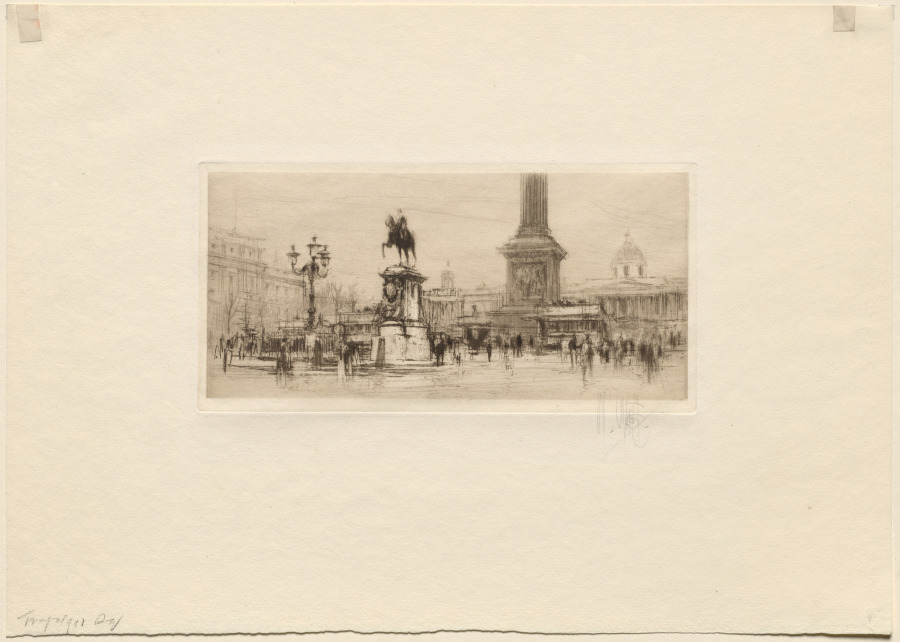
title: Trafalgar Square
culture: England, 20th century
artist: William Walcot (British, 1874–1943)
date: 1924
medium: etching, drypoint, and aquatint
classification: Print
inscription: Lower right, in graphite: W. Walcot